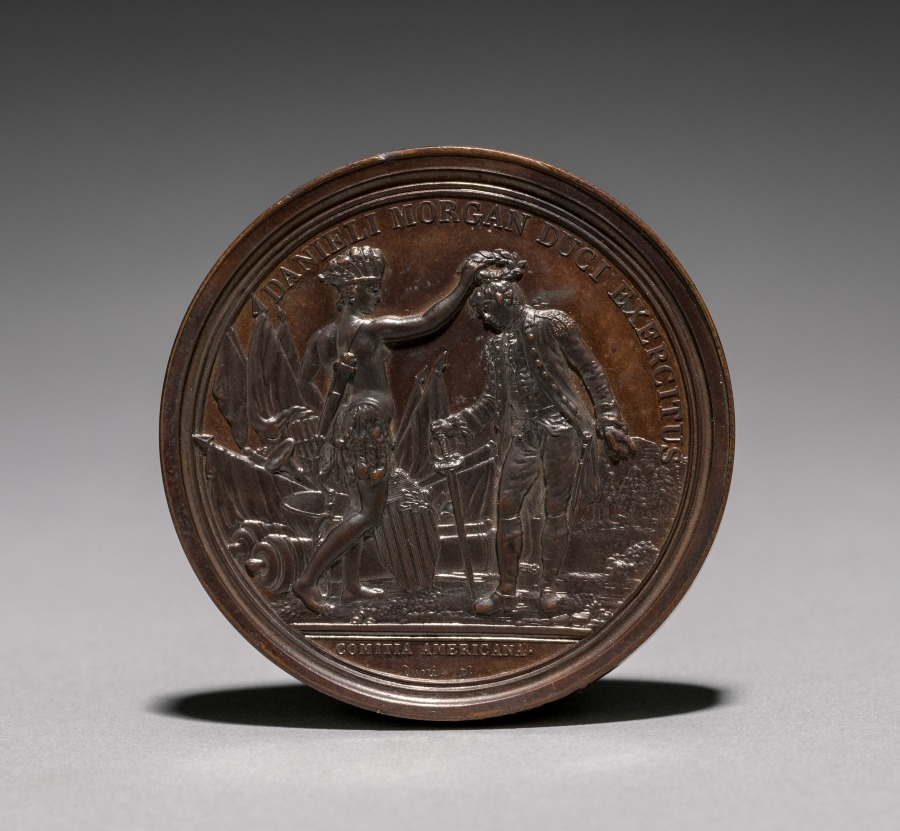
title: Medal: Daniel Morgan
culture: France, 19th century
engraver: Augustin Dupré (French, 1748–1833)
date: c.1770–1800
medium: bronze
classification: Metalwork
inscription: Danieli Morgan duci exercitus. Comitia Americana.